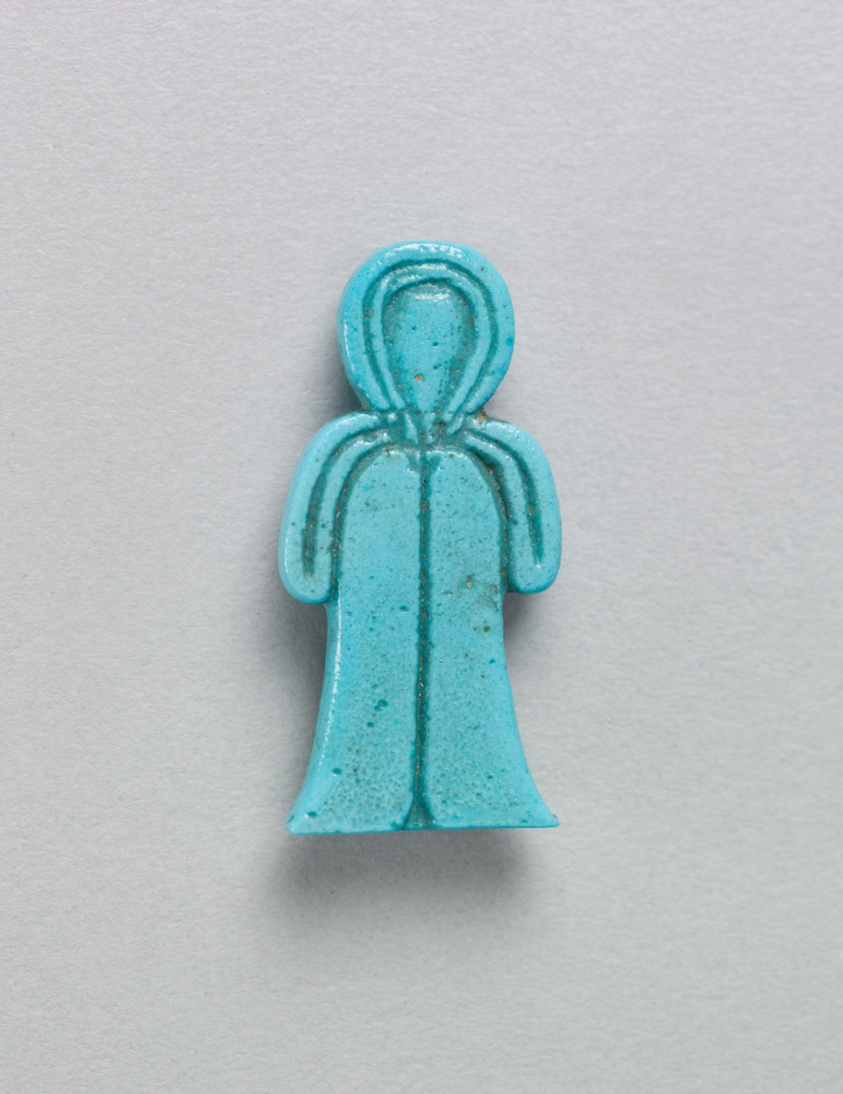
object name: Costume and Accessories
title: Tyet (Isis Knot) Amulet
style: late period (egyptian), third intermediate period, egyptian, ancient, twenty-sixth dynasty, saite period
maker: Egyptian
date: Late Period, Dynasty 26 (664–525 BCE)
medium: Faience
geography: Egypt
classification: amulet; jewelry; ceramics; ancient art; costume; faïence (composite material)